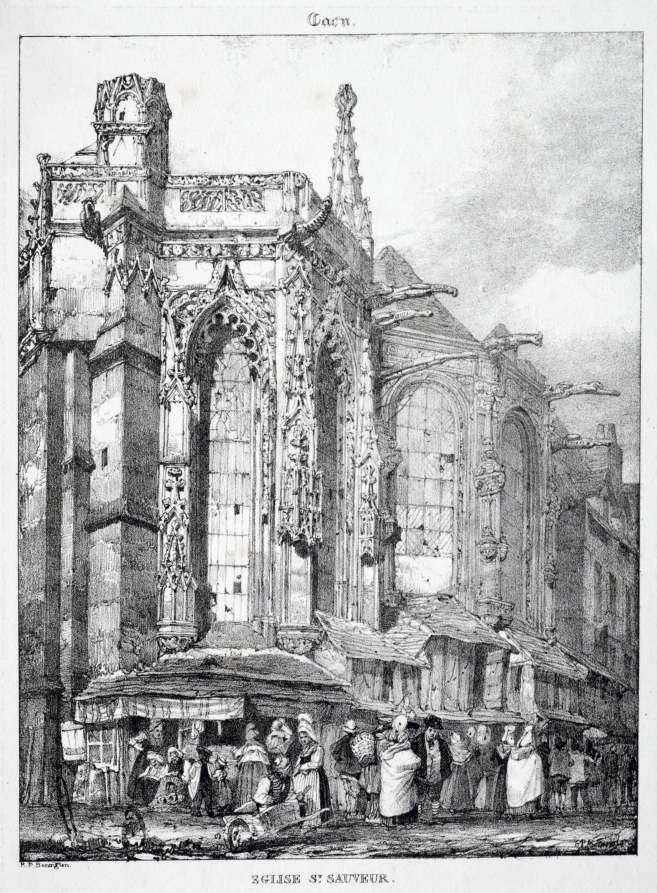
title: Restes et Fragmens d'Architecture du Moyen Age: Église St. Sauveur, Caën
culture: England, 19th century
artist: Richard Parkes Bonington (British, 1802–1828)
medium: lithograph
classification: Print